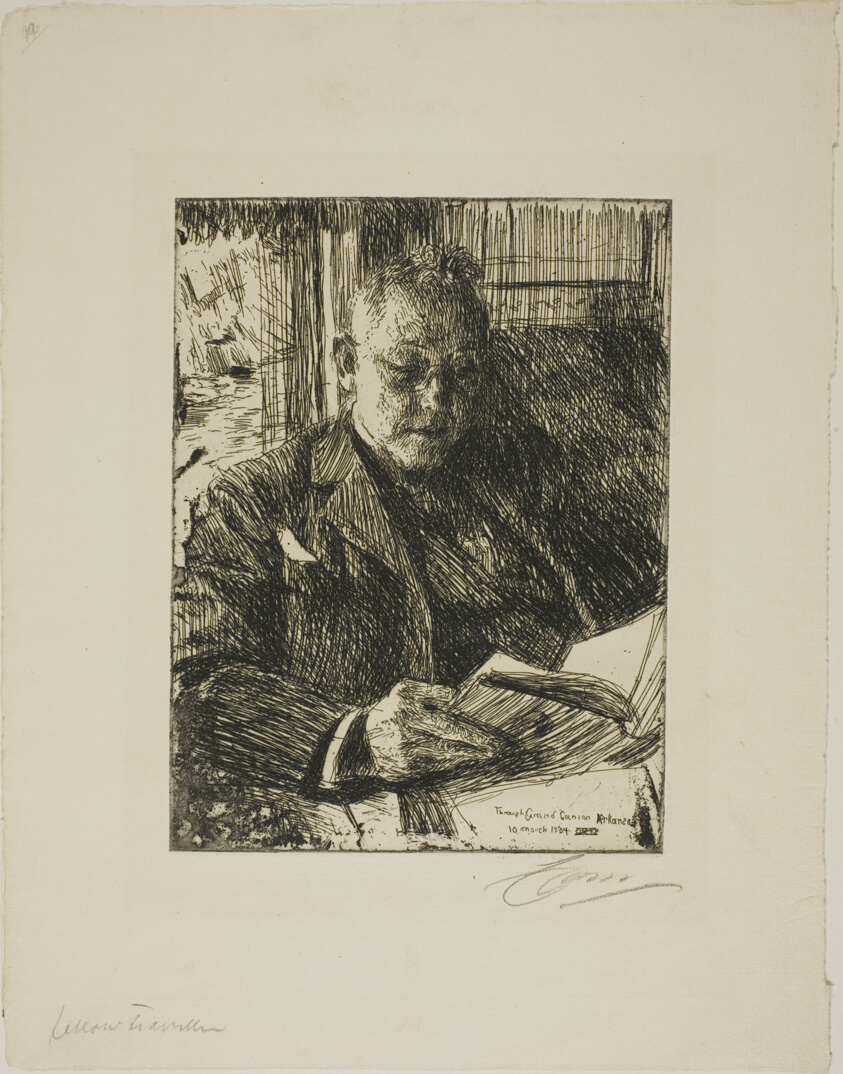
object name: Print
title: Travelling Companion (Mr. Ch. Deering)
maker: Anders Zorn (Swedish, 1860-1920)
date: 1904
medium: Etching on ivory laid paper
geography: Sweden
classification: etching; print; prints and drawing